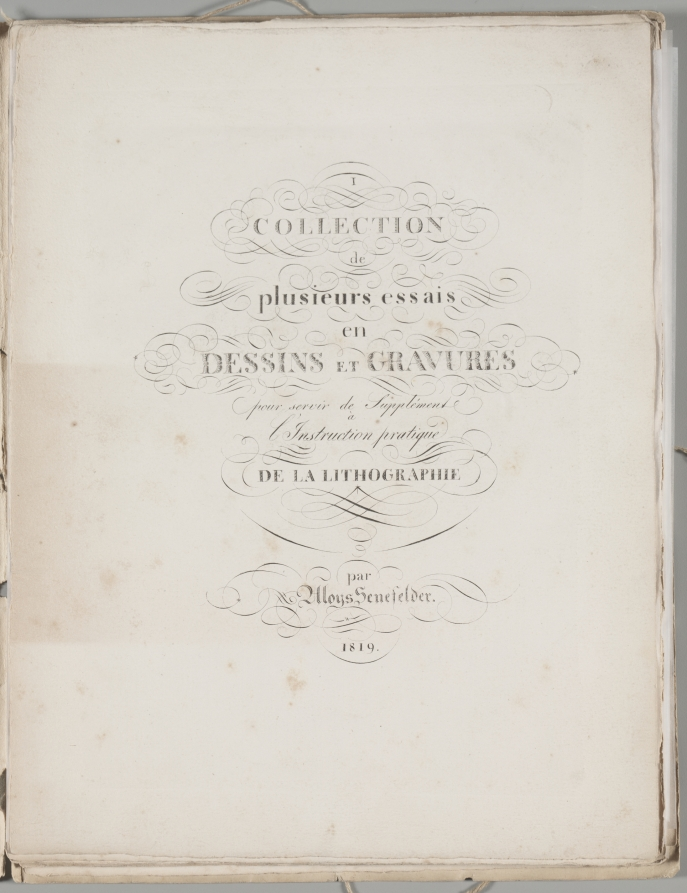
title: Art of the Lithograph: Title Page, Plate I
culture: Germany, 19th century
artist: Alois Senefelder (German, 1771–1834)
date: 1819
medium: lithograph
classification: Portfolio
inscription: on plate:I Collection / de / plusieur essais / en / Dessin et Gravures / pour server de Supplément / à / l’instruction practique / de la Lithographie / par / Aloys Senefelder. / 1819.